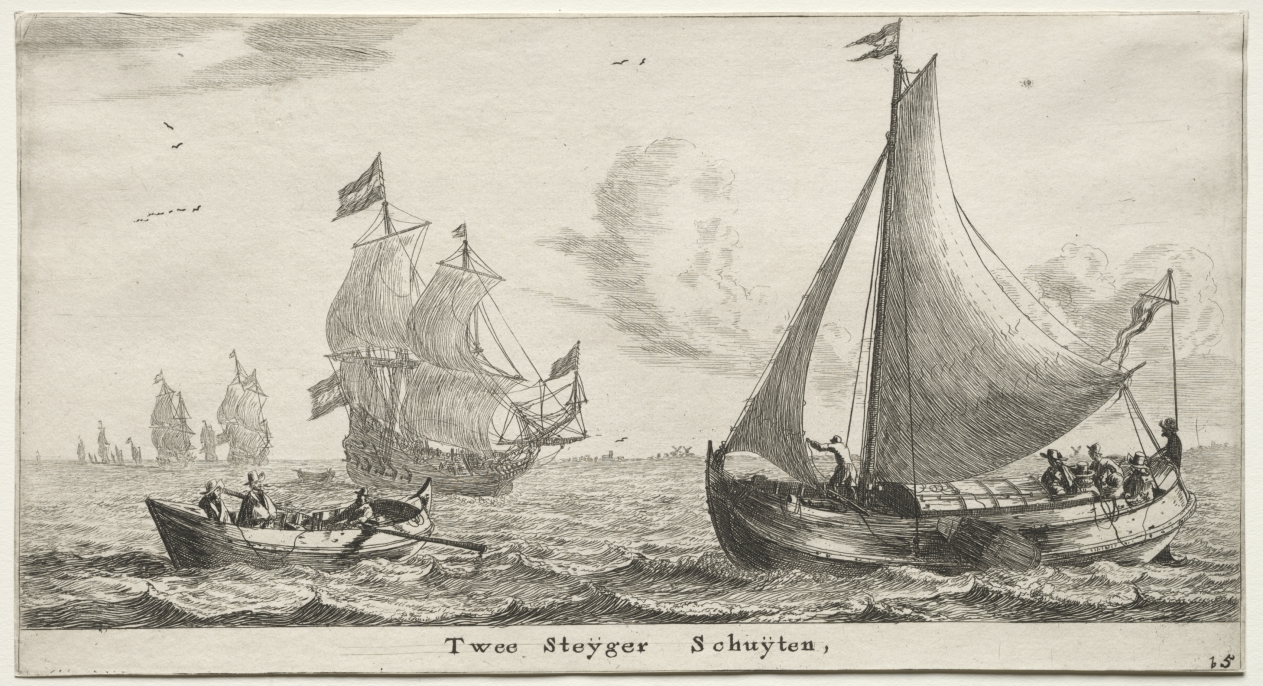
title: Various Ships and Views of Amsterdam (Verscheÿde Schepen en Gesichten van Amstelredam), Part II: Two Pier Boats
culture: Netherlands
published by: Clement de Jonghe (Dutch, 1579–1679)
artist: Reinier Nooms, called Zeeman (Dutch, c. 1623–1664)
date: 1652–54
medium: etching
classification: Print